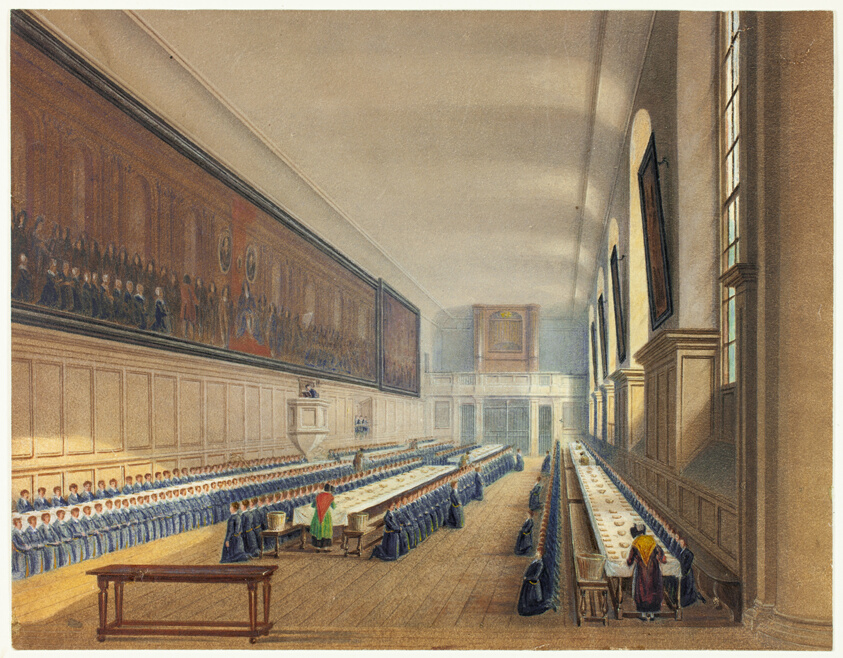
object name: Drawing and Watercolor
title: Hall of Christ's Hospital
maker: Augustus Charles Pugin (English, born France, 1762-1832)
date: c. 1815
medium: Watercolor, heightened with traces of white gouache, over graphite, on cream wove paper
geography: England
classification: watercolor; drawings (visual works); prints and drawing